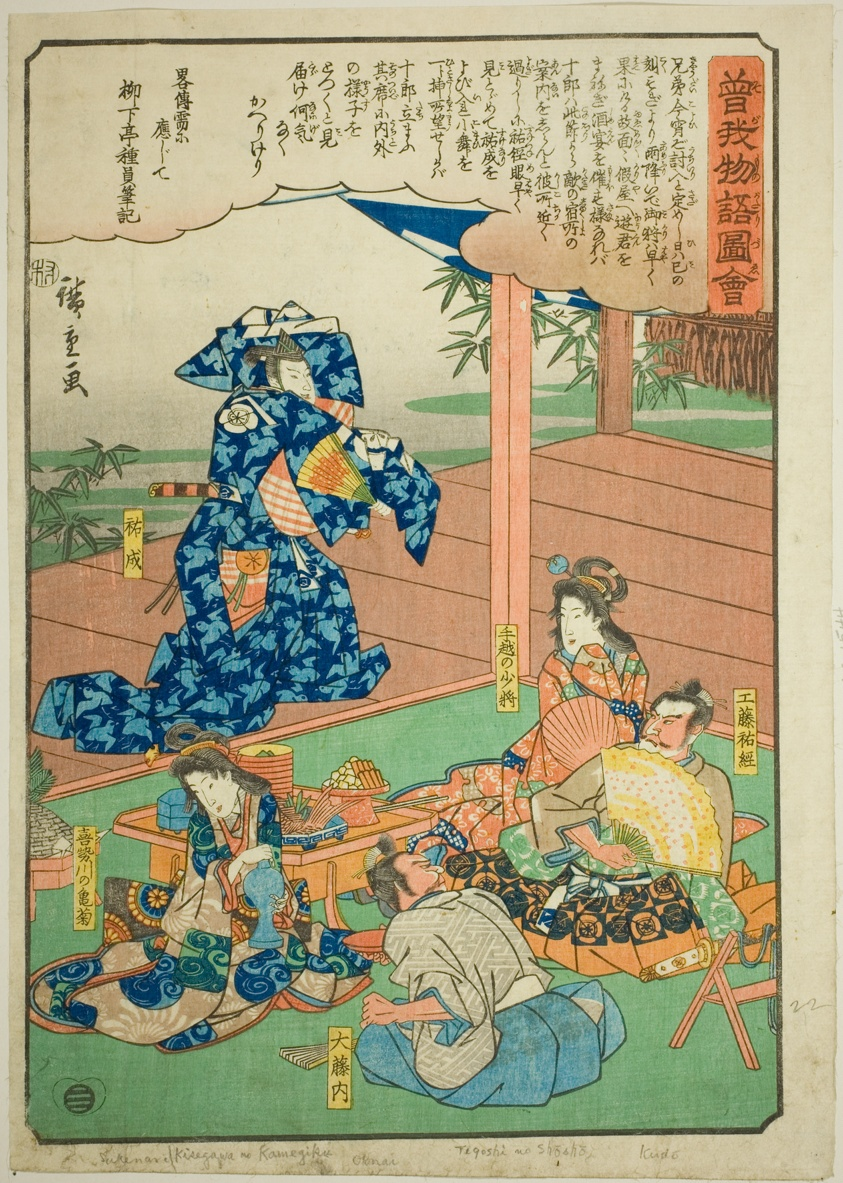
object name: Print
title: Sukenari (Soga no Juro) dancing before Suketsune, from the series "Illustrated Tale of the Soga Brothers (Soga monogatari zue)"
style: Japanese (culture or style)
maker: Utagawa Hiroshige 歌川 広重; Japanese, 1797-1858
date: c. 1843/47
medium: Color woodblock print; oban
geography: Japan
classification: woodblock print; print; asian art